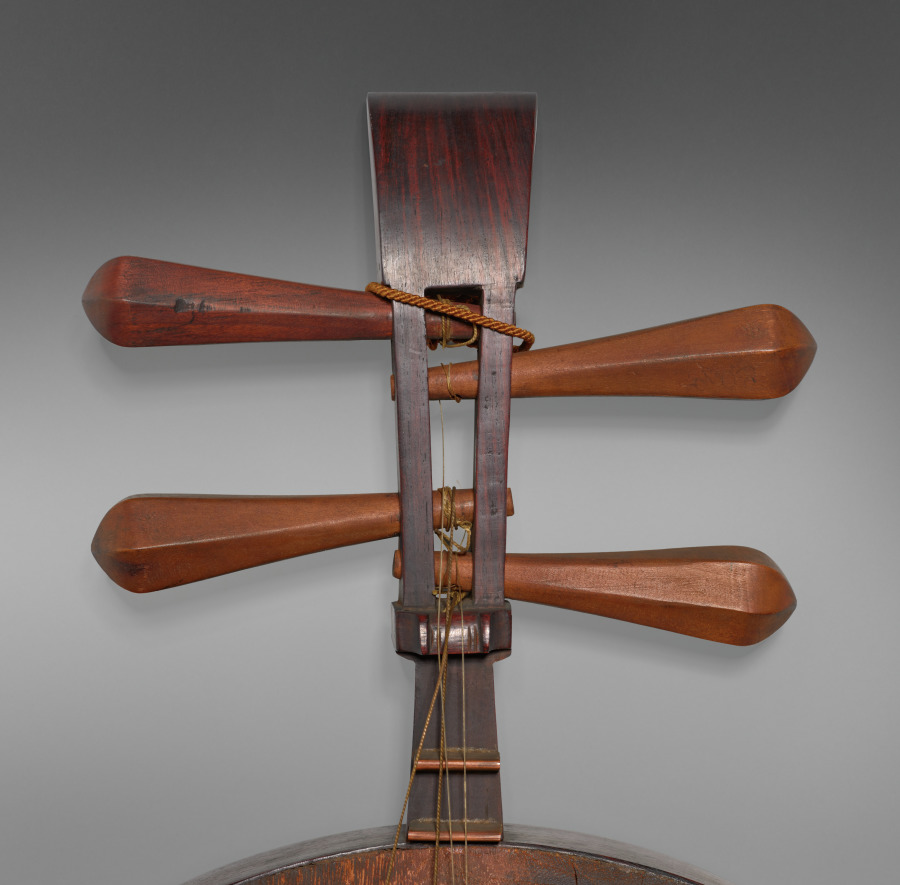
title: Moon Lute (Yueqin)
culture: China, Qing dynasty (1644-1911)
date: 1800s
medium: Rosewood, wutong (paulownia) wood, and gut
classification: Musical Instrument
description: Its resemblance to the full moon (yue 月) gives the yueqin its name. Found in popular ensembles, the Beijing and folk (jingxi) operas and used to accompany song, the yueqin has only recently been embraced by the modern Chinese orchestra. The player presses the strings between the frets making chord playing difficult but giving increased control over the timbre and intonation. Strings are plucked with fingernails or a pick using up-and-down strokes and tremolo techniques that sustain and provide color to a tone. It is known as gekkin in Japan.